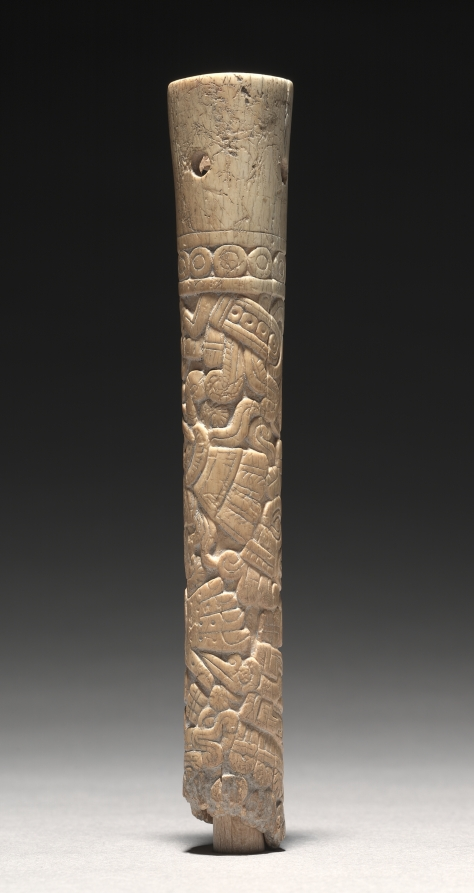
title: Carved Tube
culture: Mexico, Oaxaca, Mixtec, 13th-16th century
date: c. 1200–1519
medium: bone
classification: Jewelry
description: Carved in spiral registers, the ornamentation on this bone tube resembles Mixtec painting, both in codices (screenfold books) and architectural murals.